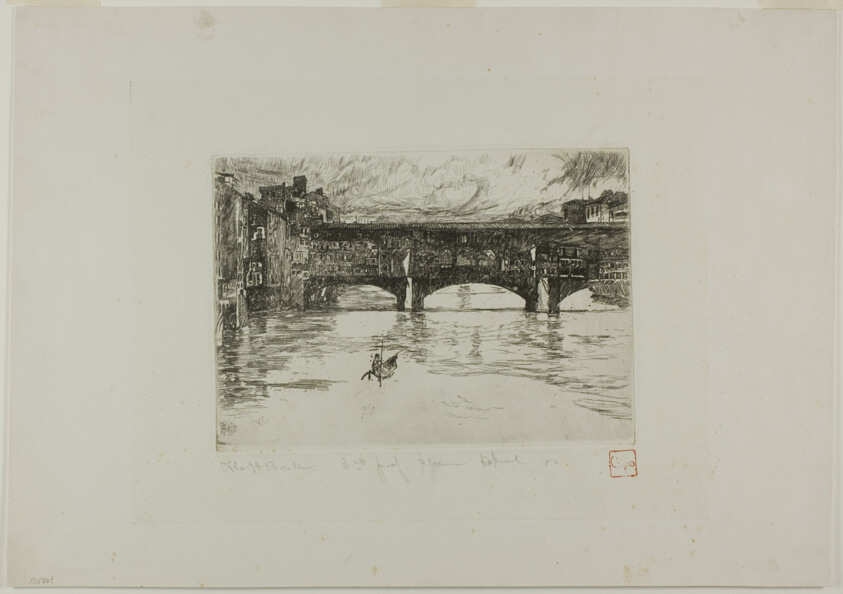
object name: Print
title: Ponte Vecchio, destroyed plate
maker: Otto Henry Bacher (American, 1856-1909)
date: 1880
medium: Etching on ivory chine mounted on ivory wove paper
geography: United States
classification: etching; print; prints and drawing